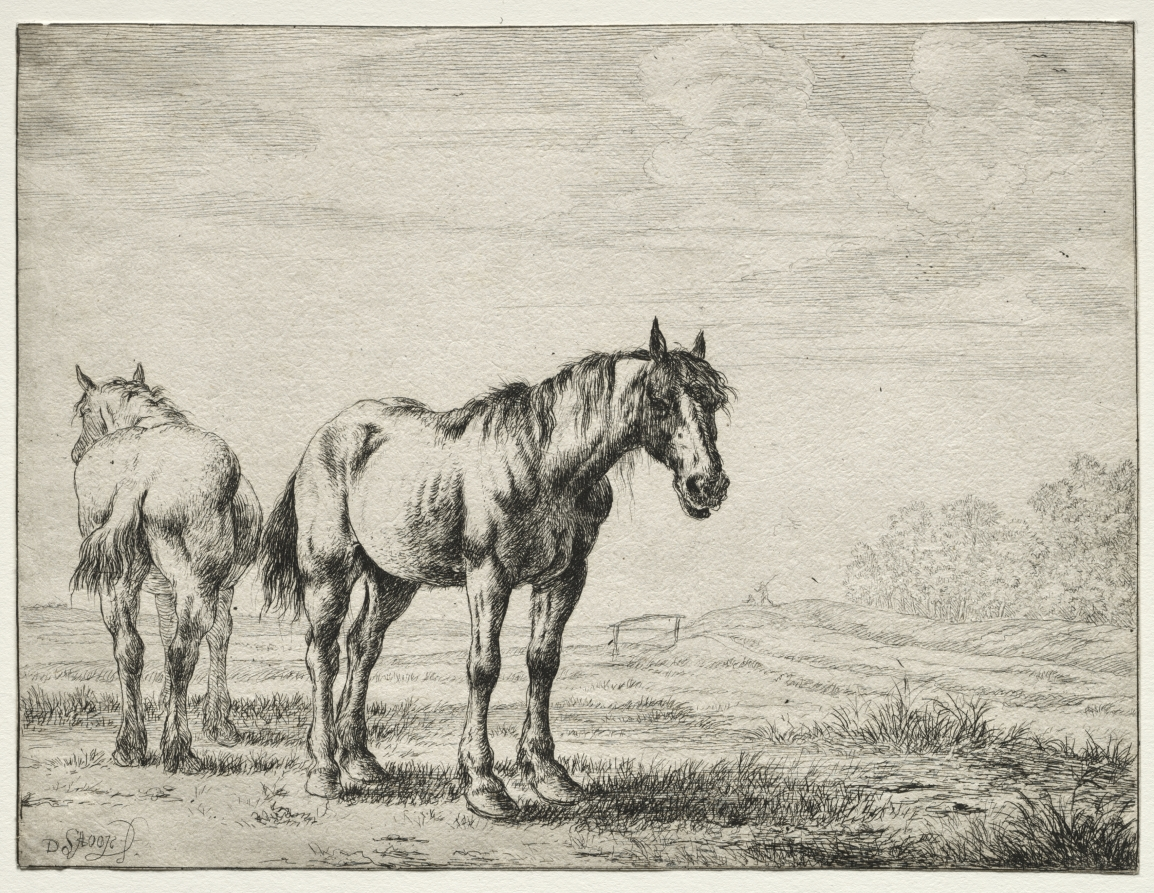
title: Two plough horses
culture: Netherlands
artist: Dirck Stoop (Dutch, c. 1618–1681)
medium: etching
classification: Print